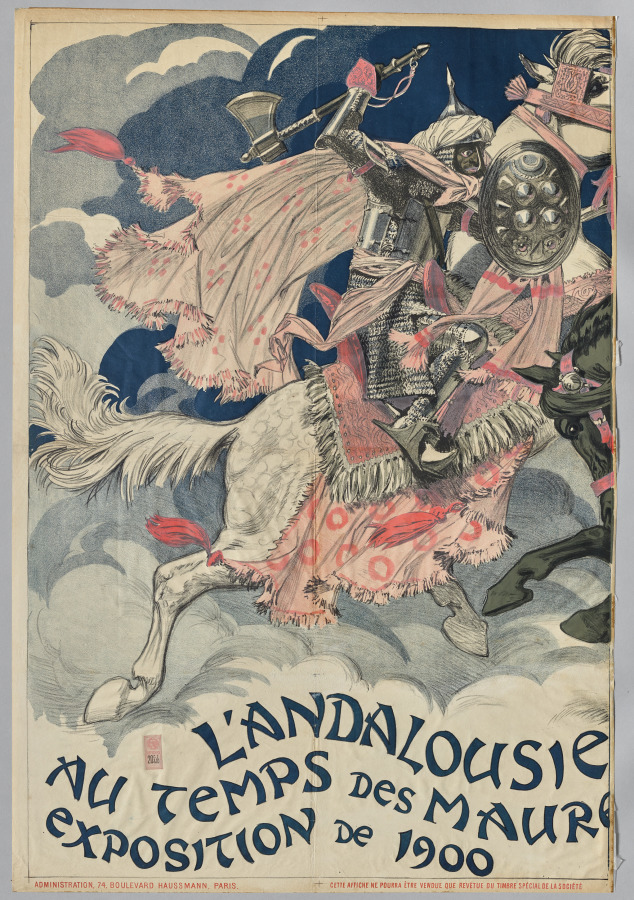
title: Andalusia at the Time of the Moors (left side)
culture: France, Paris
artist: Eugène Grasset (French, 1841–1917)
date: c. 1900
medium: color lithograph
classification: Print